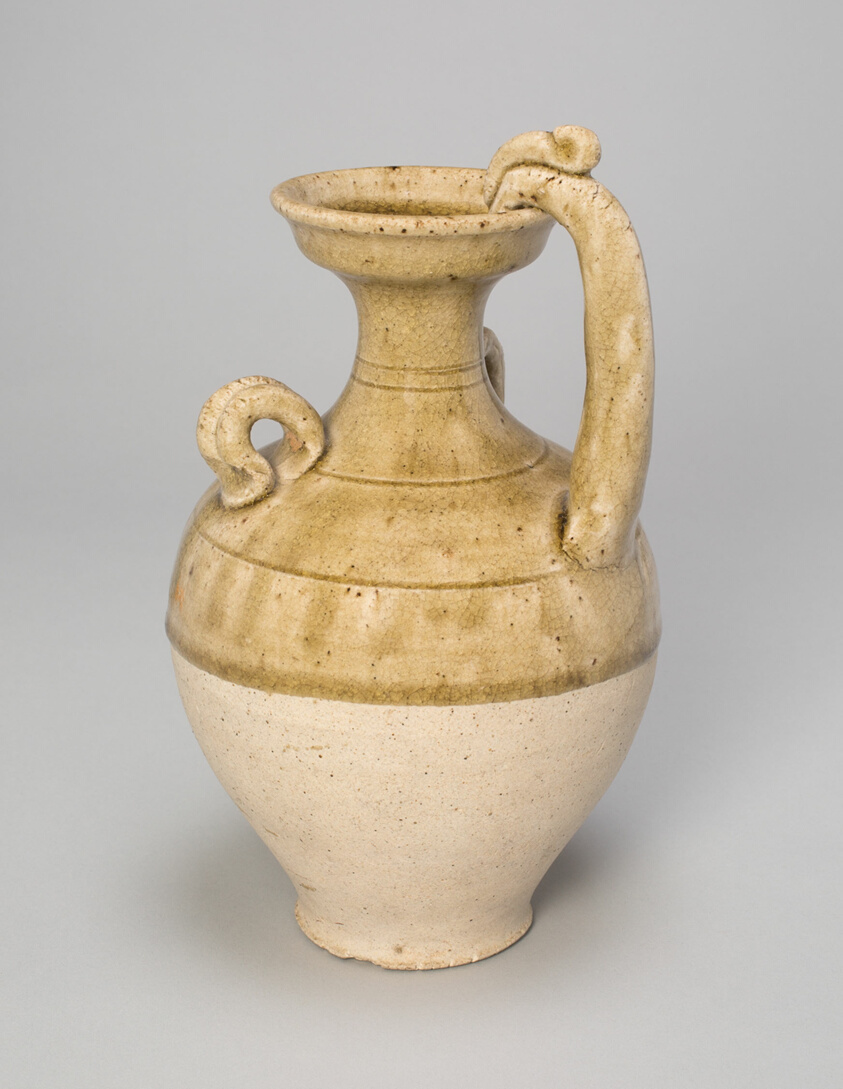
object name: Vessel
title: Vase with Dragon-Shaped Handle and Two Loop Handles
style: Chinese (culture or style)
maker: China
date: Sui dynasty (581–618)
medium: Stoneware with olive-green glaze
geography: China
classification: vase; vessel; stoneware; ceramics; asian art